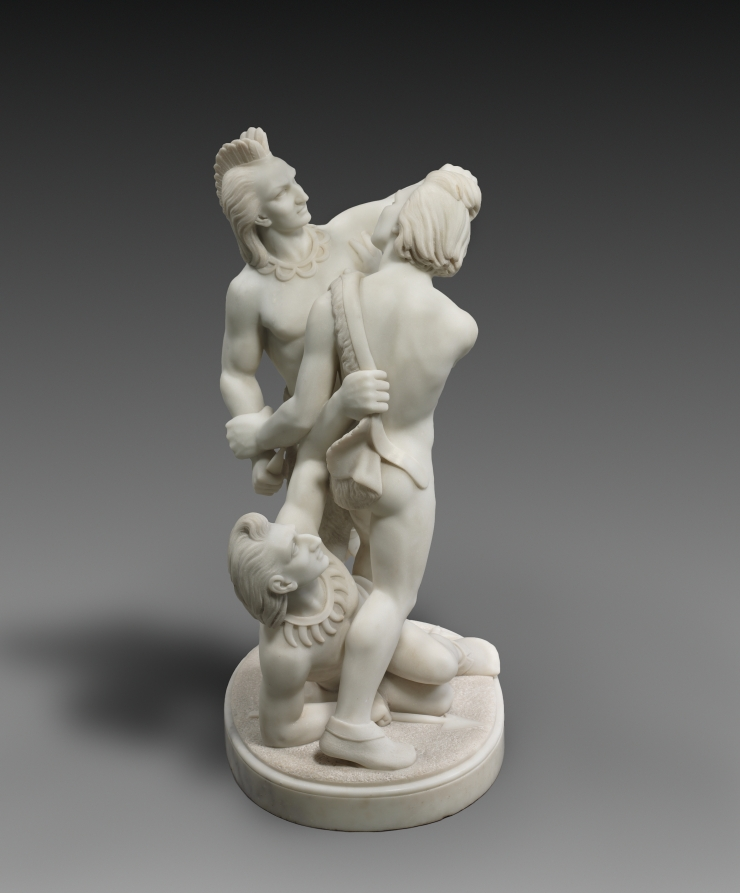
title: Indian Combat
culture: America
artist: Edmonia Lewis (American, c. 1844–1907)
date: 1868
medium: marble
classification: Sculpture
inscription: The base of the sculpture is inscribed: "EDMONIA LEWIS / FECIT A ROME 1868"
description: A spiraling composition with three intertwined figures, Indian Combat ranks as Edmonia Lewis’s most dynamic and complex creation. Although her Native American subjects typically exist in multiple versions, this example appears to be unique. Of Indigenous (Ojibwe) and African American ancestry, Edmonia Lewis studied at Oberlin College and apprenticed with a sculptor in Boston before moving to Rome in 1866. Her sculptures were readily purchased by patrons on both sides of the Atlantic.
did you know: Growing up in her Ojibwe community, Lewis went by a name that translates as "Wildfire."